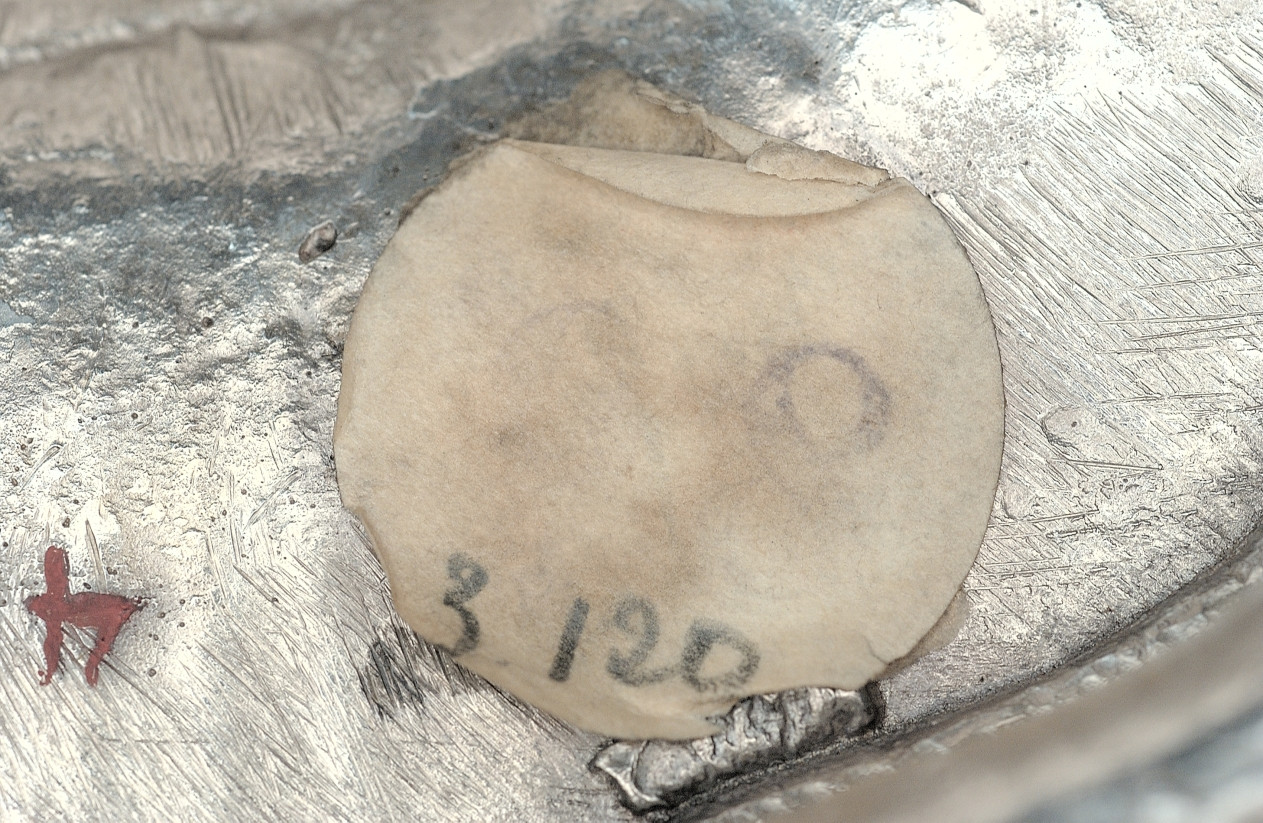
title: Candelabrum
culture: France, Paris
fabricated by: François Thomas Germain (French, 1726–1791)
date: 1757–58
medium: silver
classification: Silver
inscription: [Charge mark of Eloy Brichard , 1756−1762, beneath base]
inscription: [Warden's mark for Paris, 1757-1758, beneath base]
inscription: [Discharge mark for work intended for export, 1756−1775, on base]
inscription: [Hallmarks for Saint Petersburg, on base]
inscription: [Assayer mark of Ivan Frolov, on base]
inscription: [Russian standard of the French silver, on base]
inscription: [Maker’s mark of Francois-Thomas Germain, master silversmith on October 16, 1748, beneath drip pan one each of three bobeches]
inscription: [Charge mark Of Eloy Brichard, 1756−1762, beneath drip pan one each of three bobeches]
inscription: [Discharge mark for work intended for export, 1733 (?)−1775, beneath drip pan one each of three bobeches]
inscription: [Warden's mark for Paris, 1757−1758, beneath drip pan one each of three bobeches]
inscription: [Assayer mark of Ivan Frolov, beneath drip pan of one of three bobeches]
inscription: [Russian standard of French silver, beneath drip pan of one of three bobeches]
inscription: [Charge mark for large work of Eloy Brichard, 1756−1762, on candelabra bayonet attachment]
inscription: [Discharge mark for work intended for export, on candelabra bayonet attachment]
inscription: [Beneath base]: “Fait. Par. F. T. Germain. Sculp[teu]r. Orf[ev]re. Du Roy. Aux. Galleries. Du Louvre. A Paris. 1758”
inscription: [Beneath base]: "Du no.32"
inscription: [Beneath base]: "No 465"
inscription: [Engraved Russian Imperial coat-of-arms, beneath base]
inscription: [Modern inscription in a round paper label, beneath base]: “[?]8” [printed in black]: “3120” [written in pencil]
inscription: [Modern inscription in a rectangular paper label, beneath base]: “…IN/FRANCE” [printed in black]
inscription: [Modern inscription in a rectangular paper label, beneath base]: “46” [written in black ink]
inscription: [Engraved cipher composed with two “M”’s (?) surmounted by a royal crown, on base]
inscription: [Engraved, on base]: "No 465"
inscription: [Engraved, on base]: "du No 32"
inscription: [Engraved cipher composed with two “M”’s (?) surmounted by a royal crown, on one bobeche]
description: This candelabrum is part of a pair. Its design blurs the line between function and decoration. The arms twist and curve, appearing as flower stems while physically supporting the candles. Though this visual unity is typical of the Rococo style, the influence of the rising neoclassical style is evident in the allegorical scenes of light that decorate each candelabra’s stem.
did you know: These candelabra are part of a dinner service sent from Paris, France, to Saint Petersburg, Russia, in two separate shipments, the first of which contained 270 objects for 8 dozen place settings.